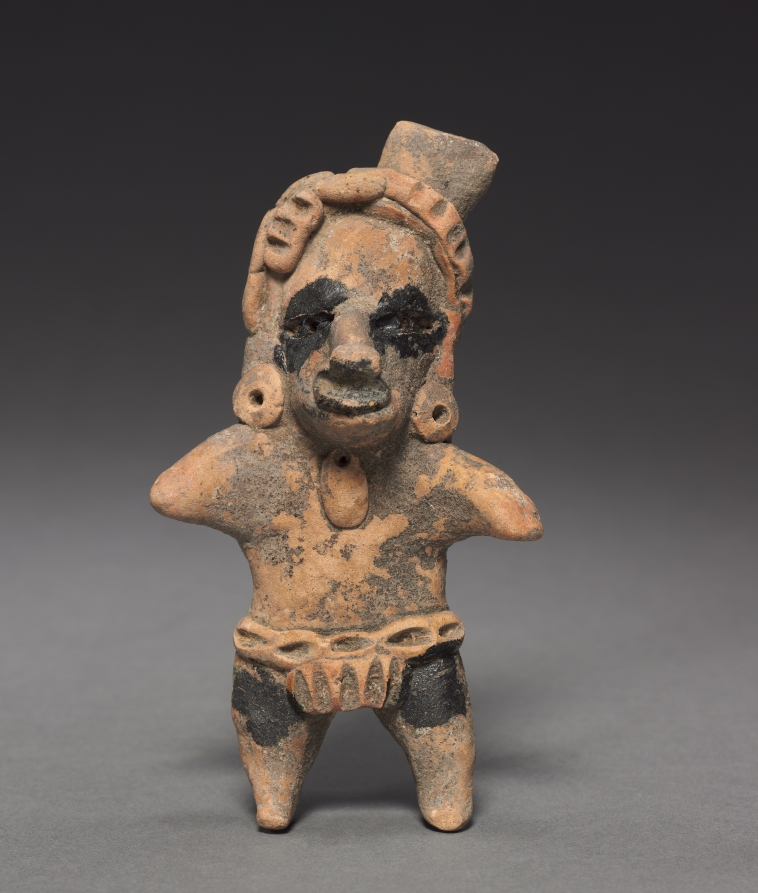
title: Standing Figurine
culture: Mexico, Veracruz, Remojadas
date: c. 150–1 BCE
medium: earthenware with asphalt paint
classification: Sculpture